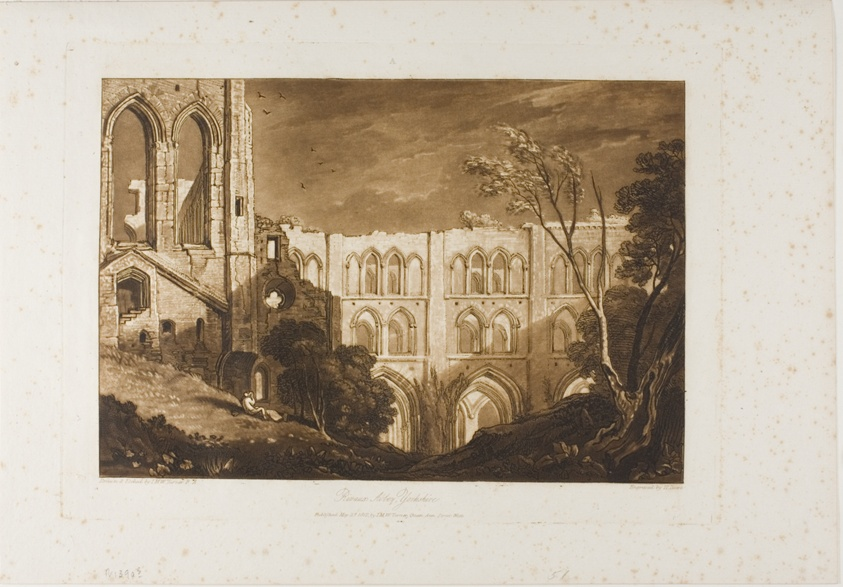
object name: Print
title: Rivaux Abbey, plate 51 from Liber Studiorum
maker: Joseph Mallord William Turner (English, 1775-1851); Engraved by H. Dawe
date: published May 23, 1812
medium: Etching and engraving in brown on ivory laid paper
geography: England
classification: etching; print; prints and drawing